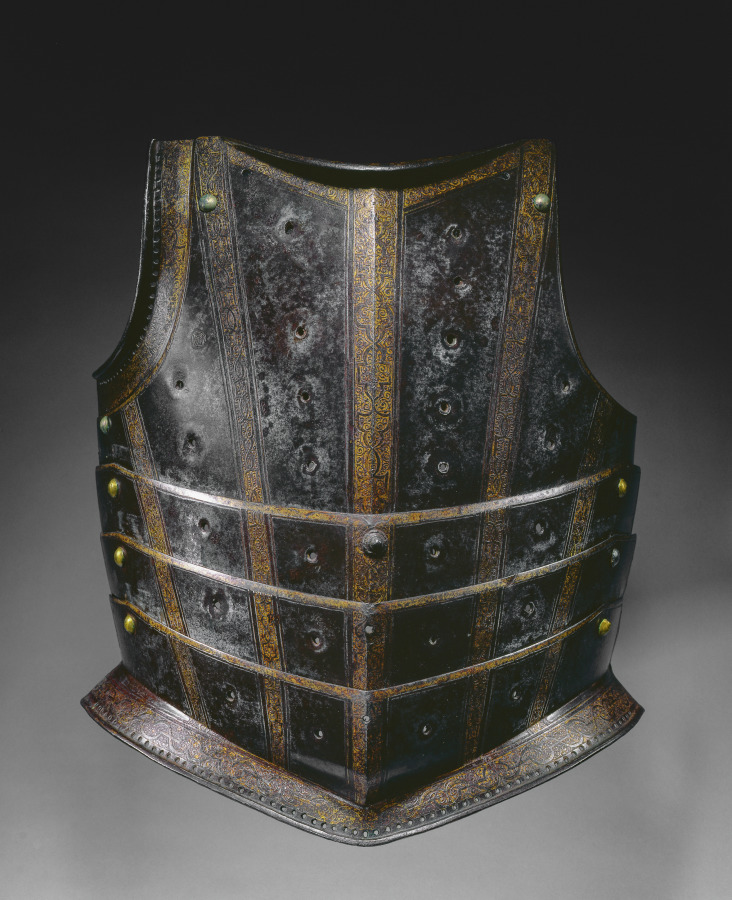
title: Breastplate from Hussar's Cuirass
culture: Germany, Augsburg or Hungary, 16th century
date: c. 1580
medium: Steel (originally blued, now russet), etched and gilded strapwork bands;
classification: Arms and Armor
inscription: TAMGA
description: This style of breastplate, with its numerous articulating lames, was probably used by a Hungarian hussar, a type of light cavalryman. The steel plates were originally blued-now turned russet-and etched and gilded with strapwork bands. The rows of vertical holes once provided gilt-brass settings for stones or glasspaste jewels. The effect would have suggested the semi-oriental costume and armor of the Near East favored by Polish and Hungarian armies of the late Renaissance.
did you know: The breastplate’s contours, like the ridge down the center, were designed to deflect arrows and other projectiles.